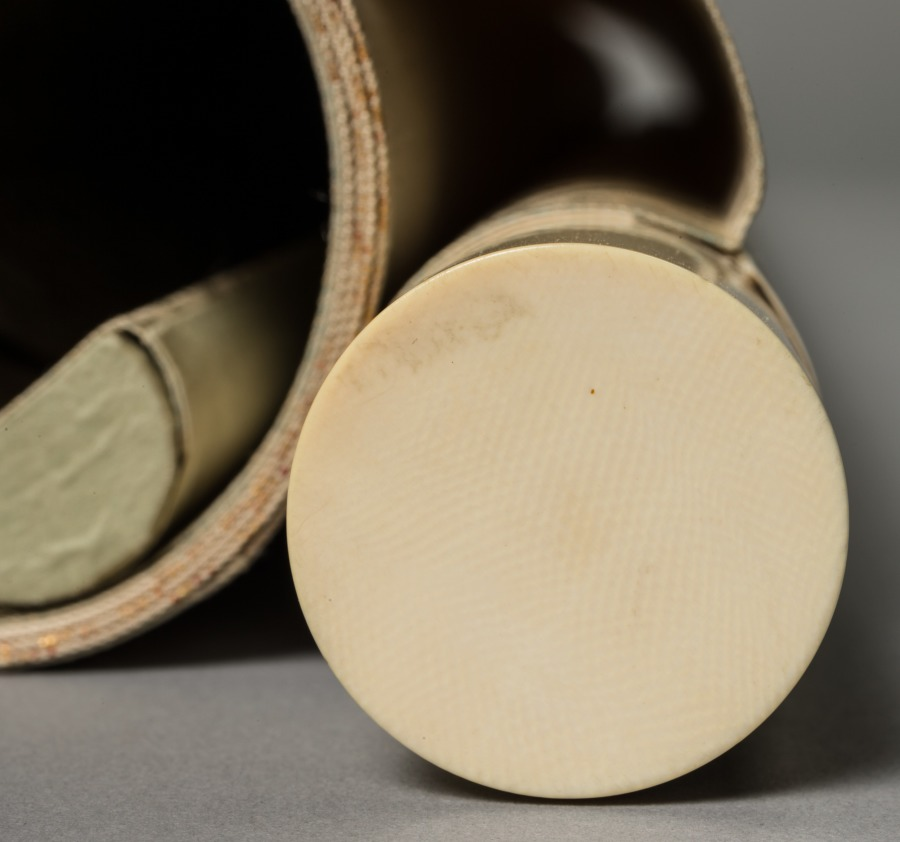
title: Spring Dance Scene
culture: Japan, Edo period (1615–1868)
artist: attributed to Hishikawa Moronobu (Japanese, c. 1618–1694)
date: mid- to late 1600s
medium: hanging scroll; ink and color on silk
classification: Painting